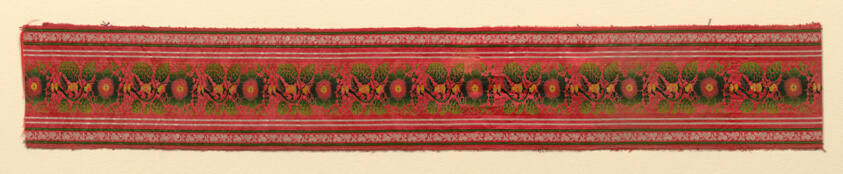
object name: Textile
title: Ribbon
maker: England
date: c. 1840/50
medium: Silk, plain weave; brocaded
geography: England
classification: textile; weaving